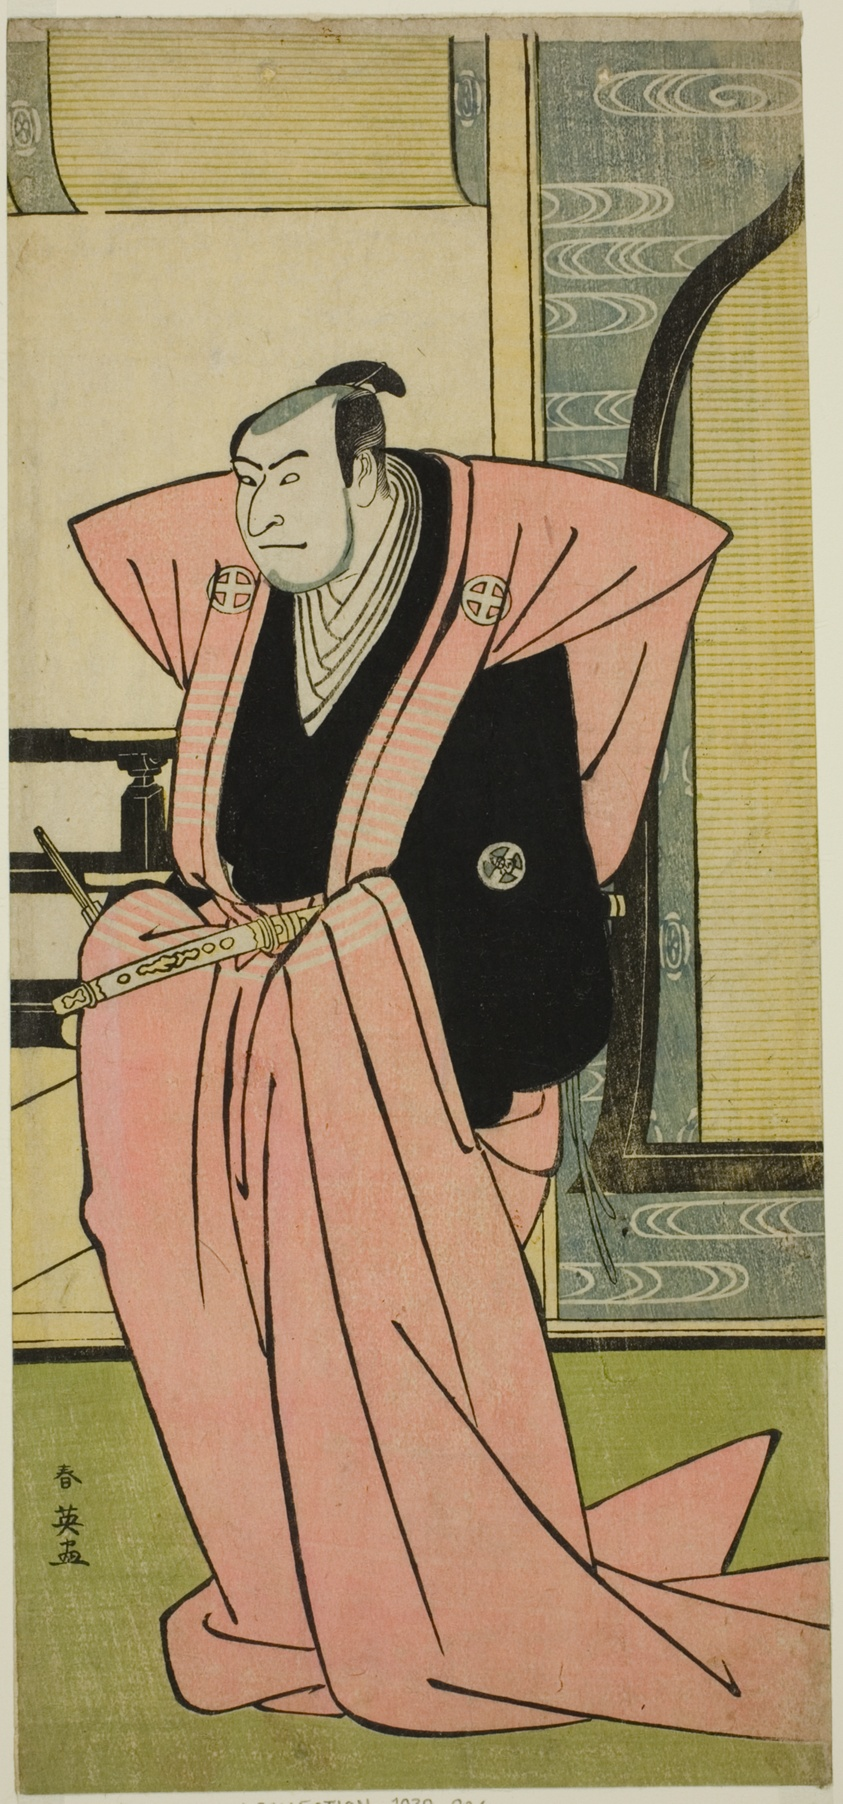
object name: Print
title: The Actor Otani Oniji III in an Unidentified Role in the Play Yukimi-zuki Eiga Hachi no Ki (?), Performed at the Nakamura Theater (?) in the Eleventh Month, 1787 (?)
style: Japanese (culture or style)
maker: Katsukawa Shun'ei (Japanese, 1762-1819)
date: c. 1787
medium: Color woodblock print; hosoban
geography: Japan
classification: woodblock print; print; asian art